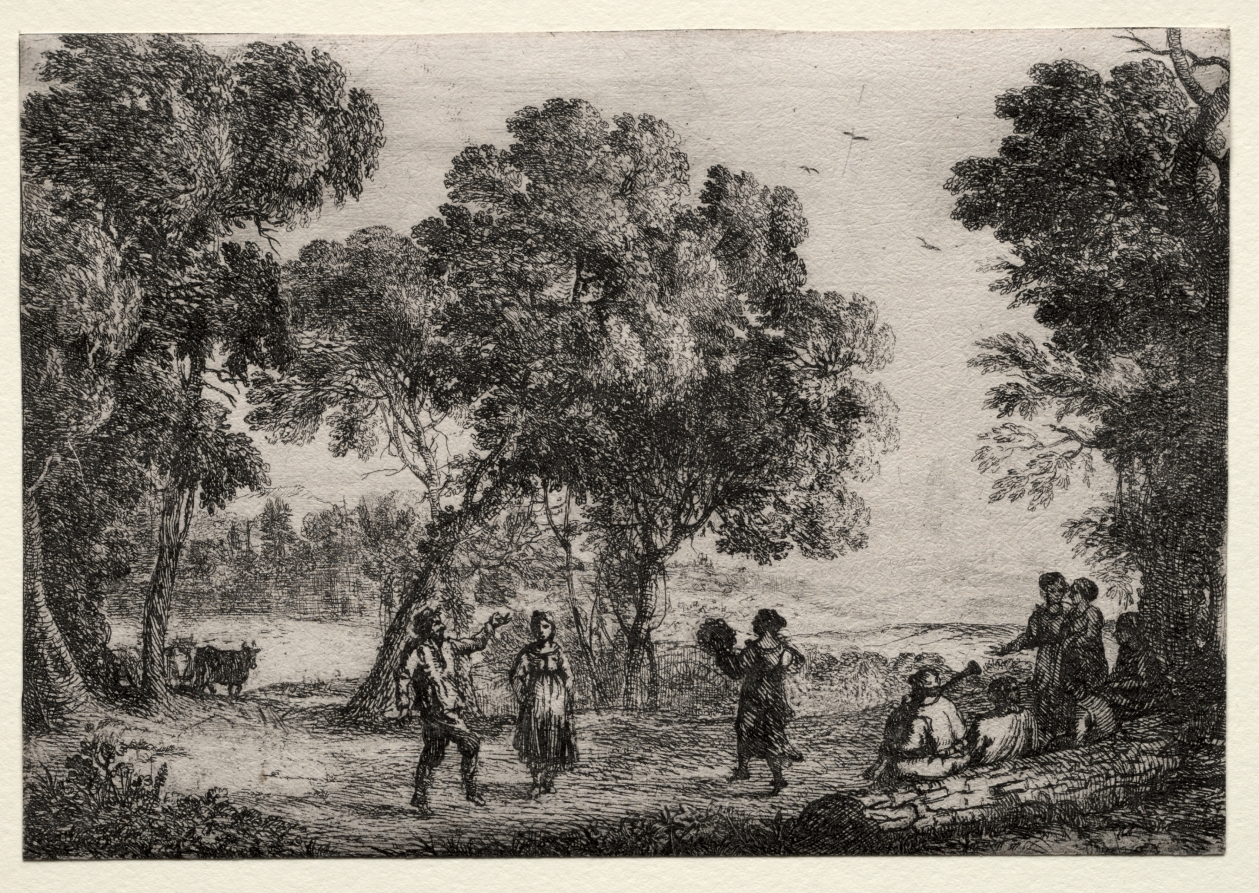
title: Landscape with a Country Dance (Small Plate)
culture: France, 17th century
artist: Claude Lorrain (French, 1604–1682)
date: c. 1637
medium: etching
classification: Print